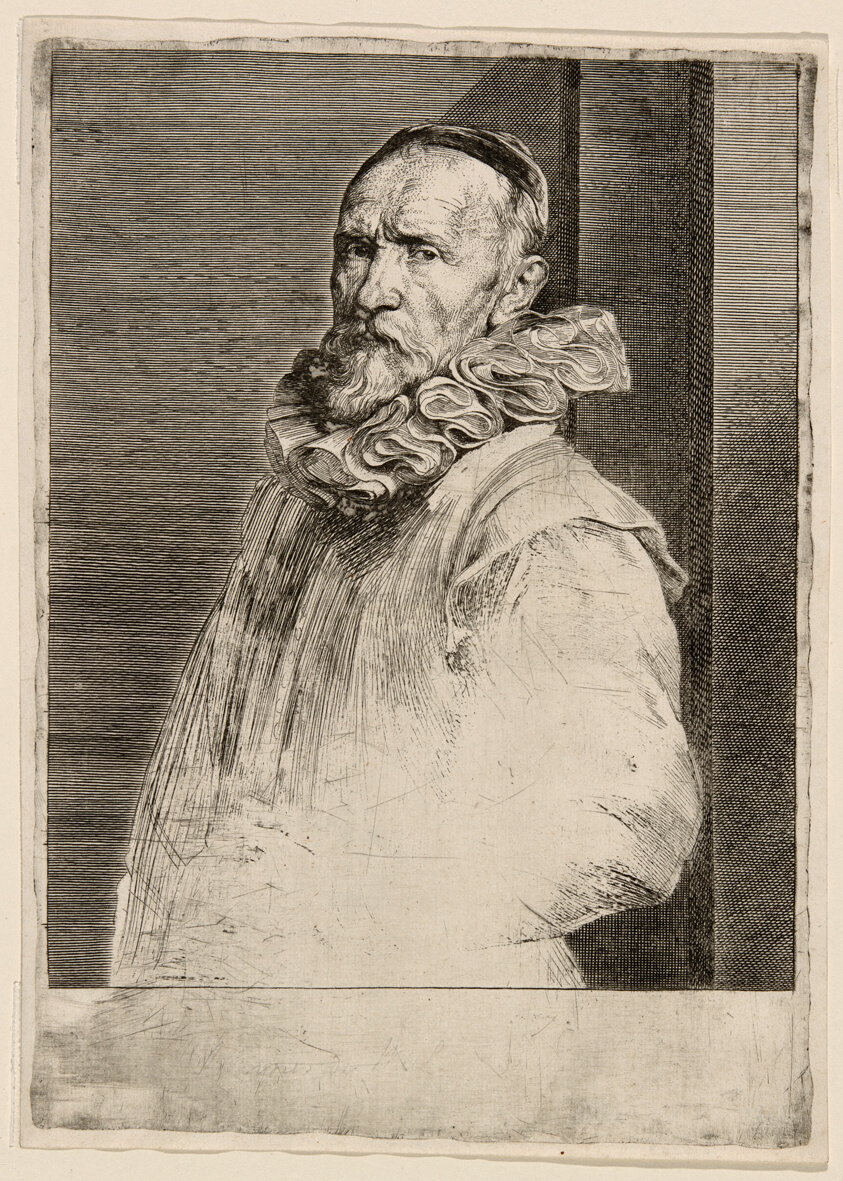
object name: Print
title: Jan de Wael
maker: Anthony van Dyck (Flemish, 1599-1641)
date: 1630/33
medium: Etching and engraving in black on ivory laid paper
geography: Flanders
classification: etching; print; prints and drawing